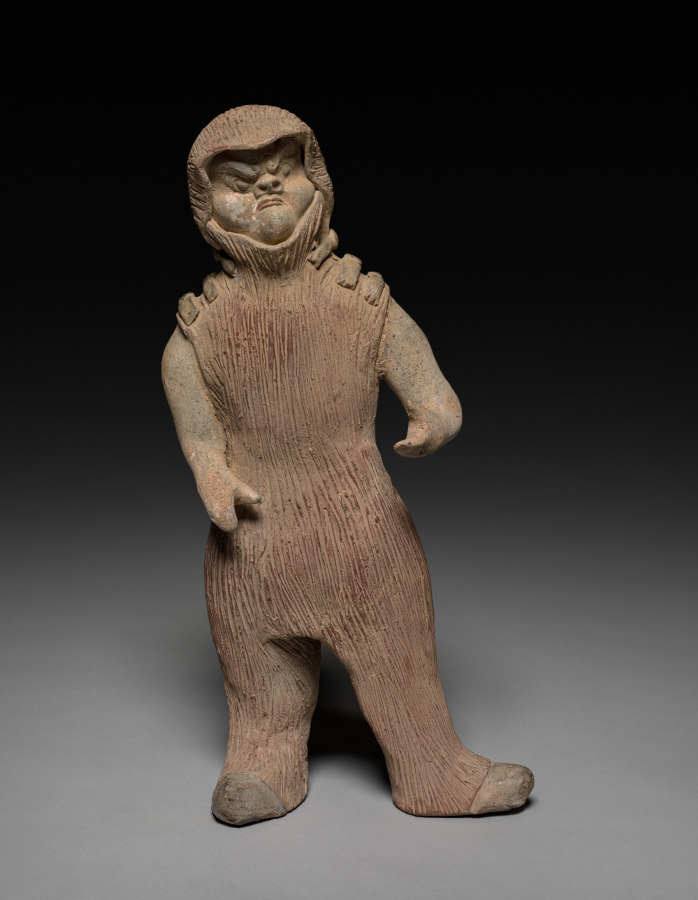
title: Figure of a Warrior in Leather Armor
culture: China, Modern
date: 20th Century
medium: buff earthenware with traces of polychromy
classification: Sculpture